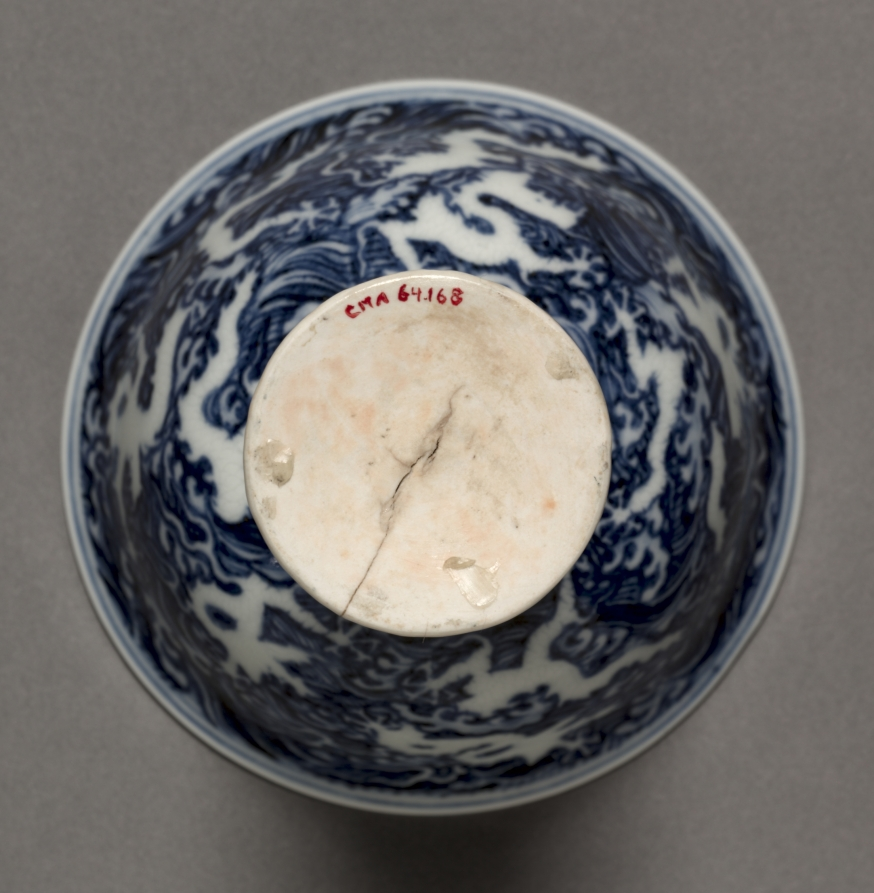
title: Stem Cup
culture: China, Jiangxi province, Jingdezhen, Ming dynasty (1368-1644), Xuande mark and period (1426-1435)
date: 1426–35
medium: porcelain with reversed underglaze blue and incised decoration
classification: Ceramic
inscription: 大明宣德年製